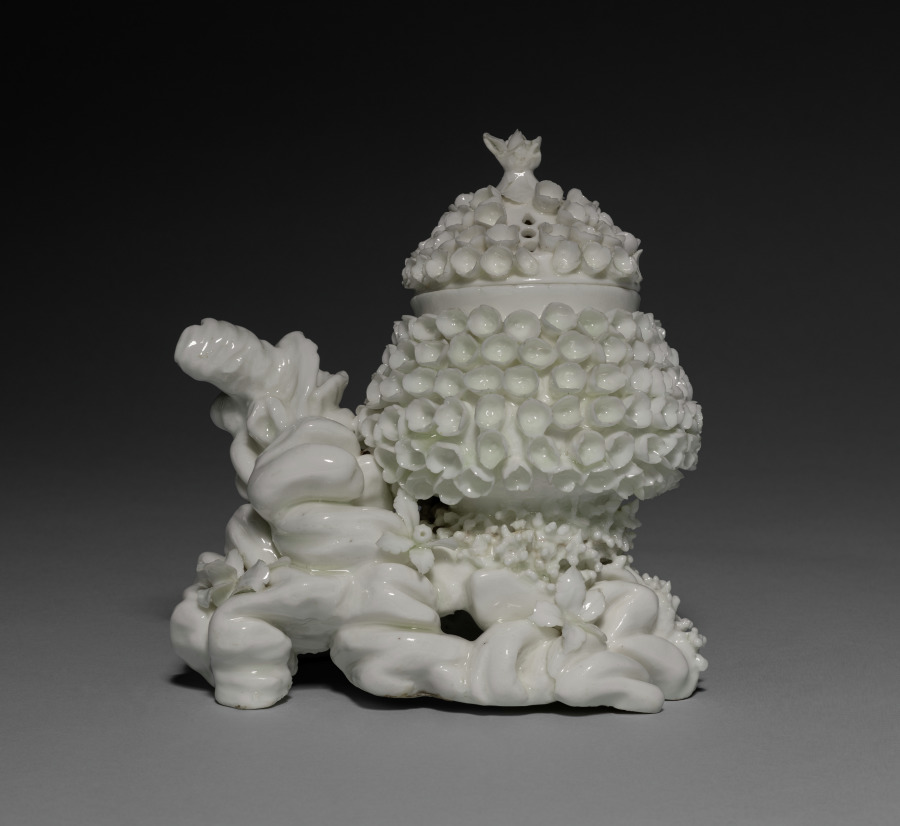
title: Potpourri Vase with Cover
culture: France, Vincennes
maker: Mennecy Factory (French)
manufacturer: Vincennes Porcelain Factory (France, 1740–56)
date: c. 1750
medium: soft-paste porcelain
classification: Ceramic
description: The delicate flowers that cover the lid and base of this vase draw inspiration from the schneeballblüten, or guelder rose, pattern produced at the German Meissen porcelain factory. The flowers on the lid are spaced by small, unobtrusive perforations that allow the scent of the potpourri, a mixture of flowers, herbs, and spices placed inside this vase, to disperse.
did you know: This style of potpourri vase, a pot atop a rockwork base, was popularly produced by major 18th-century porcelain factories including those at Vincennes, Chantilly, and Saint-Cloud.